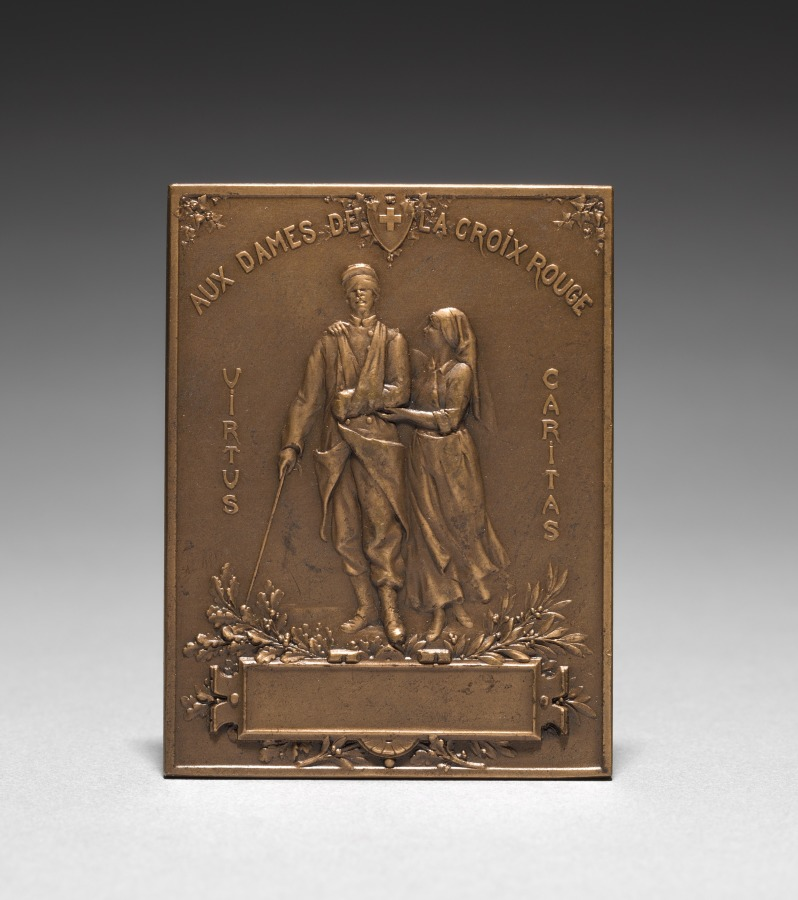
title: Medallion (reverse)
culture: France, 19th-20th century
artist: Henri Emile Allouard (French, 1844–1929)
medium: bronze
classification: Metalwork